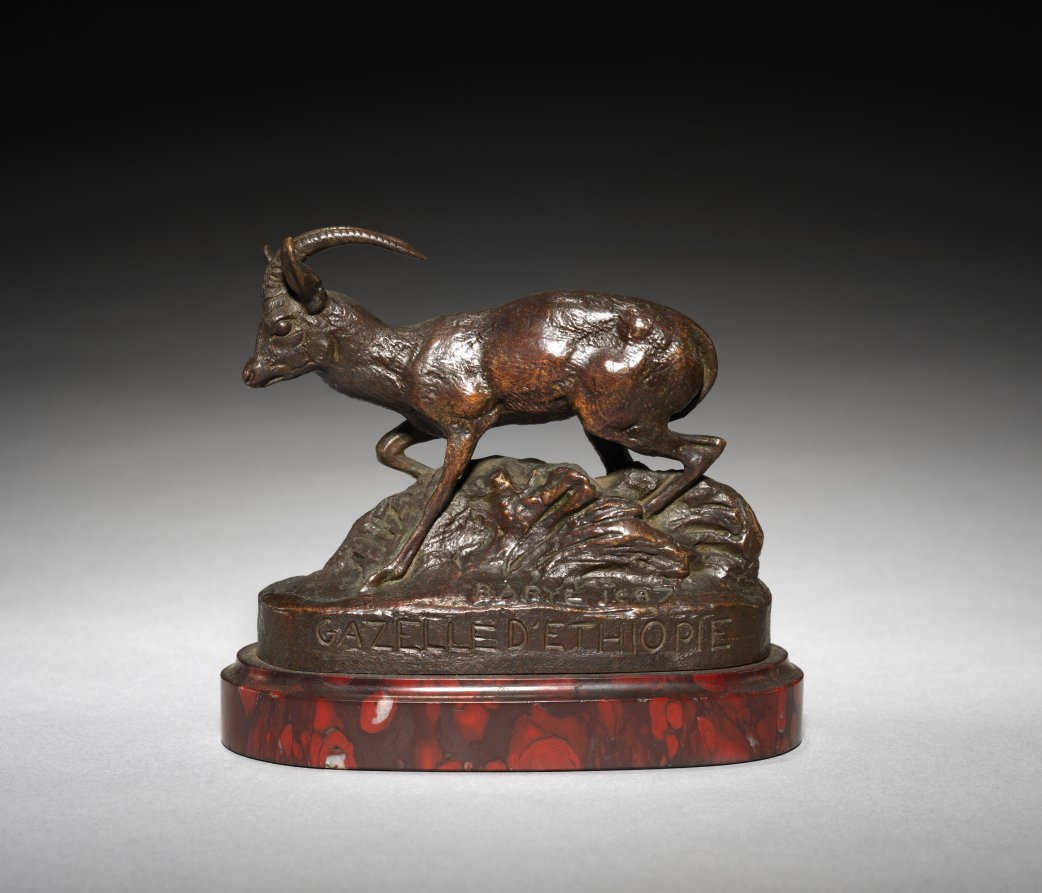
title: Gazelle d'Ethiopie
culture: France, 19th century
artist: Antoine-Louis Barye (French, 1796–1875)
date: 1887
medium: bronze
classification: Sculpture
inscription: Signed: "Barye 1887 Gazelle d'Ethiopie"